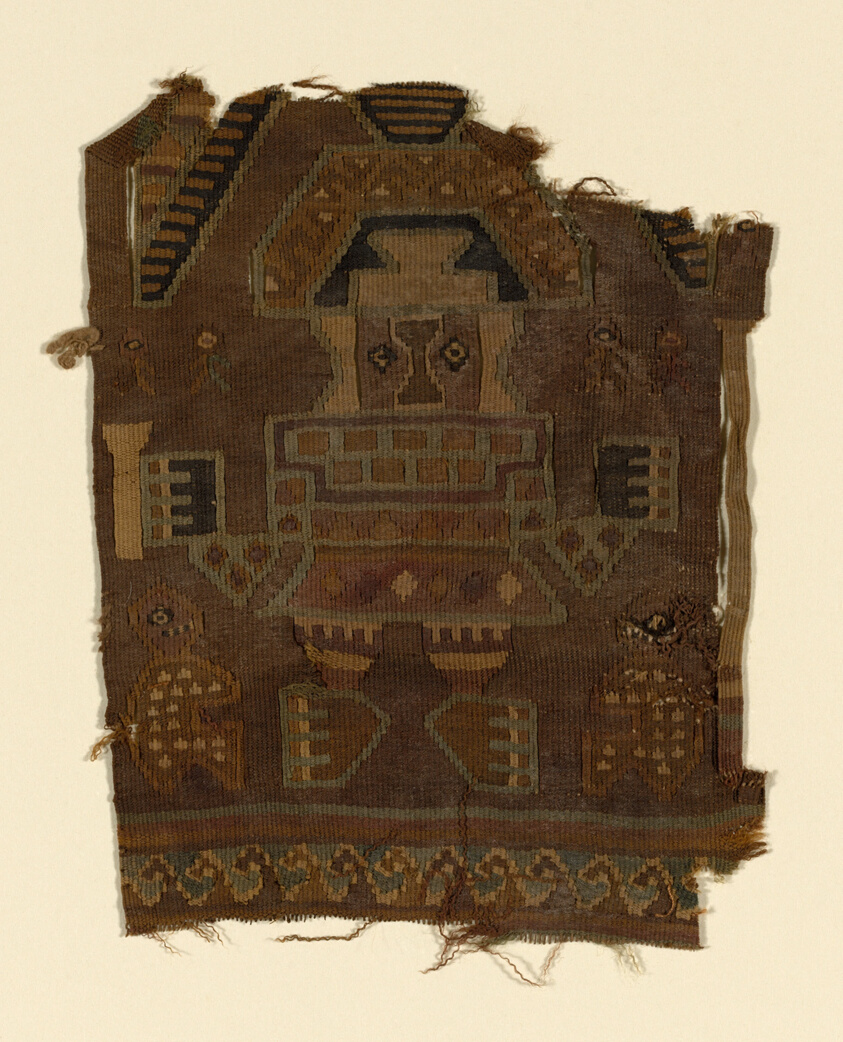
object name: Textile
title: Fragment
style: chimú, late intermediate period, Pre-Columbian, americas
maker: Probably north coast, Peru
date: 900/1470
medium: Cotton and wool (camelid), slit tapestry weave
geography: Peru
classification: textile; weaving